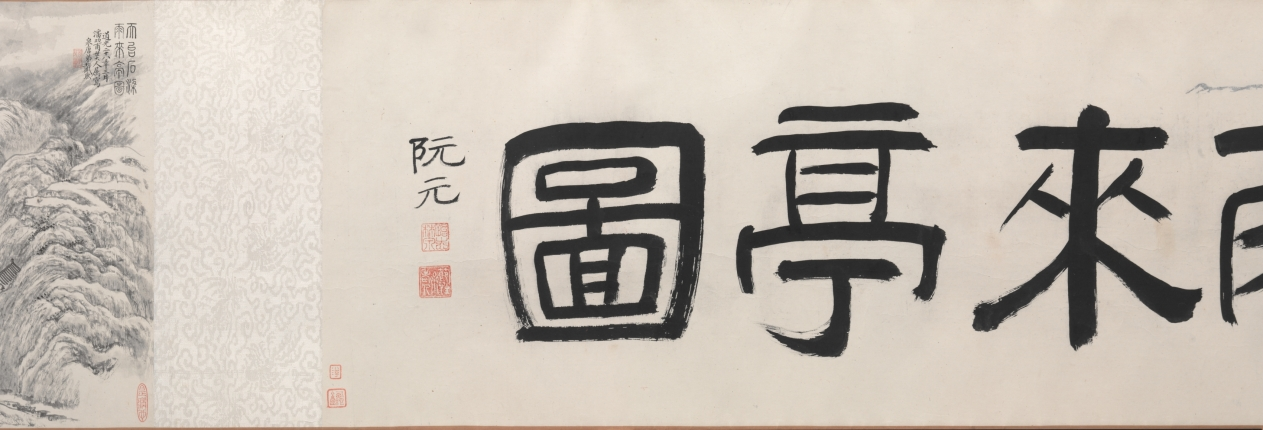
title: Rain-coming Pavilion by the Stone Bridge at Mt. Tiantai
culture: China, Qing dynasty (1644-1911)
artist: Dai Xi (Chinese, 1801–1860)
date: 1848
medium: handscroll, ink on paper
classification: Painting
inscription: Artist's inscription, signature, and 2 seals: Painting of Rain-Coming Pavilion by the Stone Bridge at Mount Tiantai. In the twenty-eighth year of the Daoguang era [1848], the third lunar month, requested by and painted for Pan Gongfu 潘功甫 [Pan Zengyi 潘曾沂], a senior family friend. [signed] Your junior, Dai Xi from Qiantang. [seal] Hebi jian Dai 何必見戴. [seal, lower right corner] Shih-ping yeh.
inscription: Title on frontispiece and 3 seals of Ruan Yuan (1764-1849). 1 colophon and 10 additional seals: 1 colophon, dated 1838, and 8 seals of Pan Zengyi (1792-1853); 2 seals unidentified.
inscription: Colophon by Pan Zengyi: The T'anhua [a flower that blooms only momentarily in semi-tropical areas] Pavilion near Shiliang [the natural stone bridge] was built by the Grand Chancellor Jia. It lasted over seven hundred years. After it was destroyed this year, I happened to be there, so I suggested it be reconstructed. Among the six poems commemorating my visit, one reads: The career of the Prime Minister may be as great as the rivers and lakes,/ Unaware himself of the fact there is leaking./ I had been all over the seventy-two peaks of P'eng-lai mountains/ When the timely rain came to T'an-hua Pavilion. It had not been raining for a long time there, then unexpectedly, the rain came simultaneously with my arrival; the old monk there asked me to change the name to Rain-Coming Pavilion, in order to record the joy. The hilly fields at Mt. Tiantai have suffered by droughts. If, from this year on, they have the timely rain to bring along bountiful harvests and make people happy - so may this pavilion be our witness. Hsiao-fu shan-jen, Pan Zengyi recorded this on the first day of the twelfth lunar month in the wuxu year [1838]. Chiang Yung-ching copied respectfully on the first day of the sixth lunar month in the wushen year [1848]. trans. LYSL/WKH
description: The subject is not just Mount Tiantai in Zhejiang Province, the ancient seat of the most powerful Buddhist sect of Sui and Tang dynasties, but records a specific occasion in 1838 when an official visited Tiantai and began the reconstruction of a historic pavilion. As this coincided with the end of a long drought, the building was auspiciously renamed the Yulai (Rain-Coming 雨來) Pavilion. Ten years later, Dai Xi painted this handscroll to commemorate the occasion.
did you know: Dai Xi actively resisted the Taiping rebels and drowned himself after their 1860 capture of his hometown, Hangzhou. For this loyal deed, Dai was posthumously rewarded with a temple built in his name.